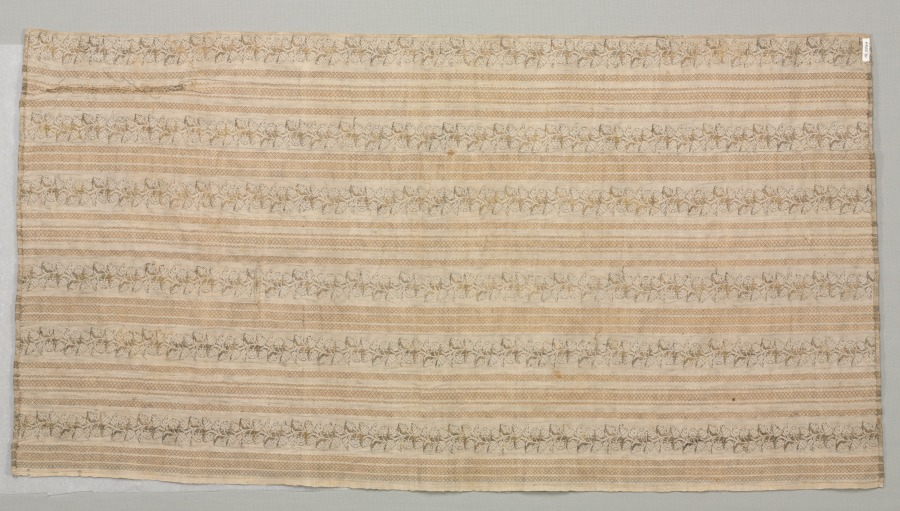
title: Fragment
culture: Iran, 19th century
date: 1800s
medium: brocade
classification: Textile